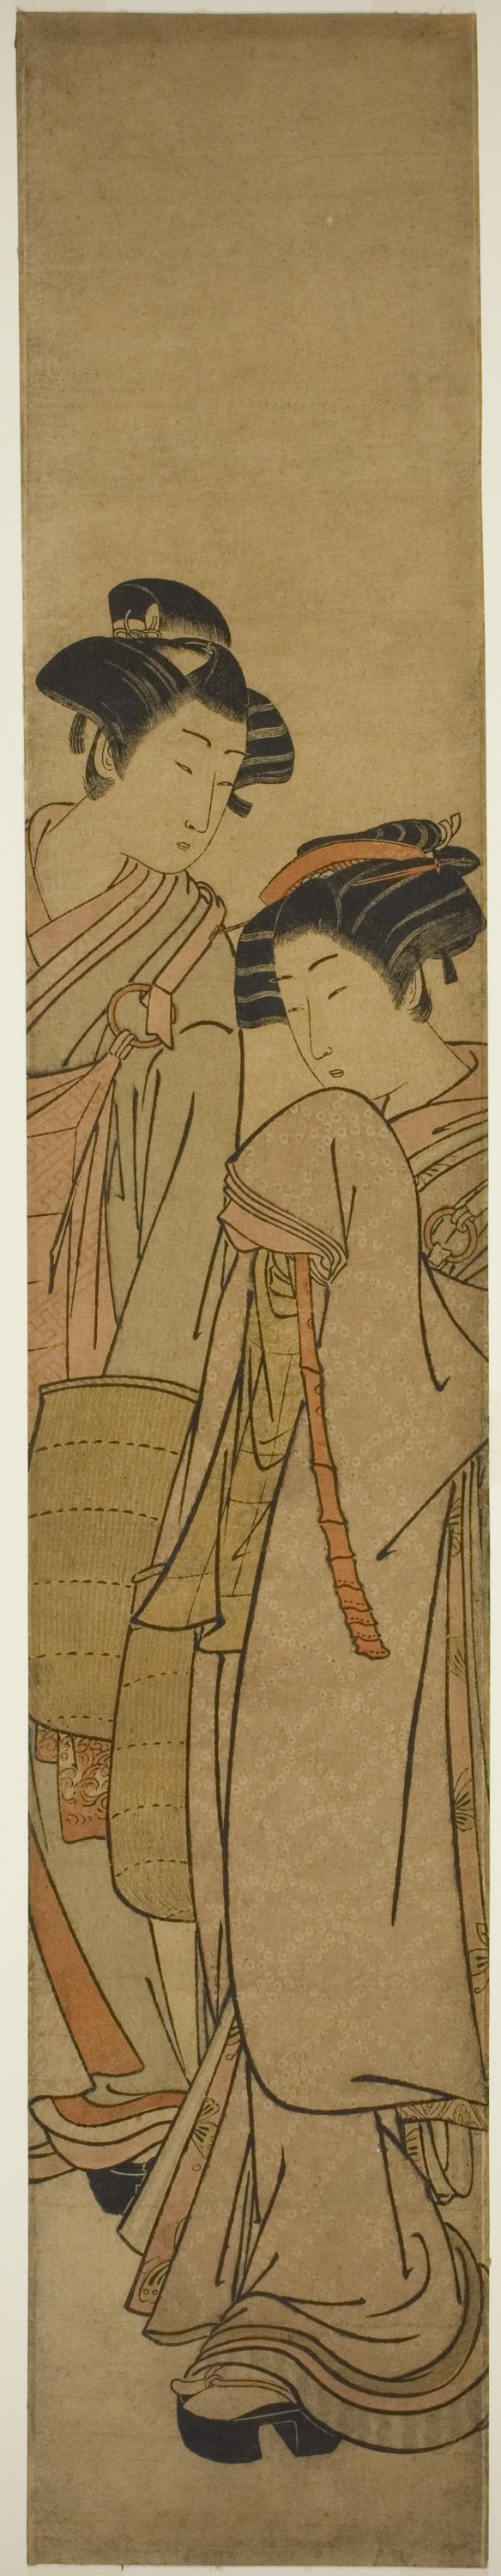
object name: Print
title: Young Couple Dressed as Mendicant Monks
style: Japanese (culture or style)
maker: Isoda Koryusai (Japanese, 1735–1790)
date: c. 1777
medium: Color woodblock print; hashira-e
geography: Japan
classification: woodblock print; print; asian art